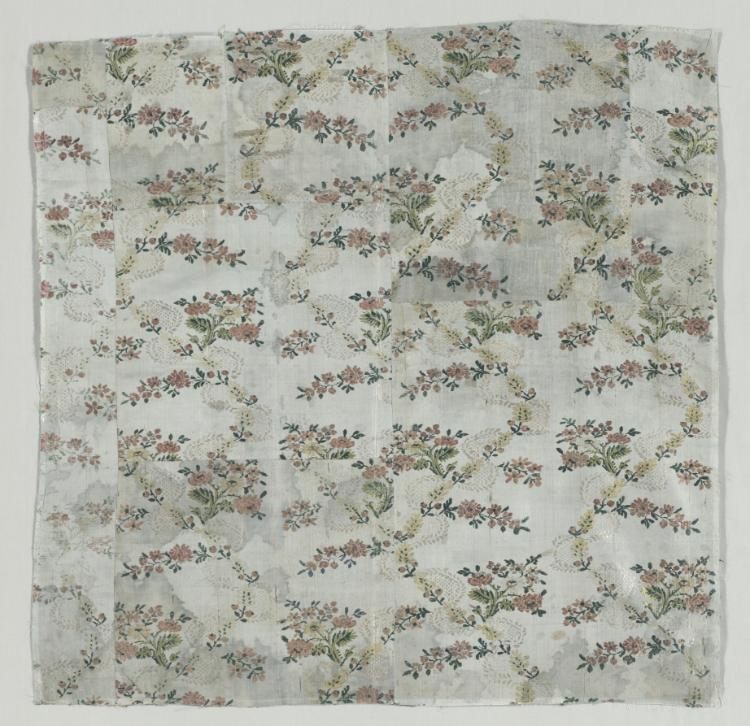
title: Brocaded Silk Cover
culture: Italy, 18th century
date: 1700s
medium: brocade, silk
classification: Textile